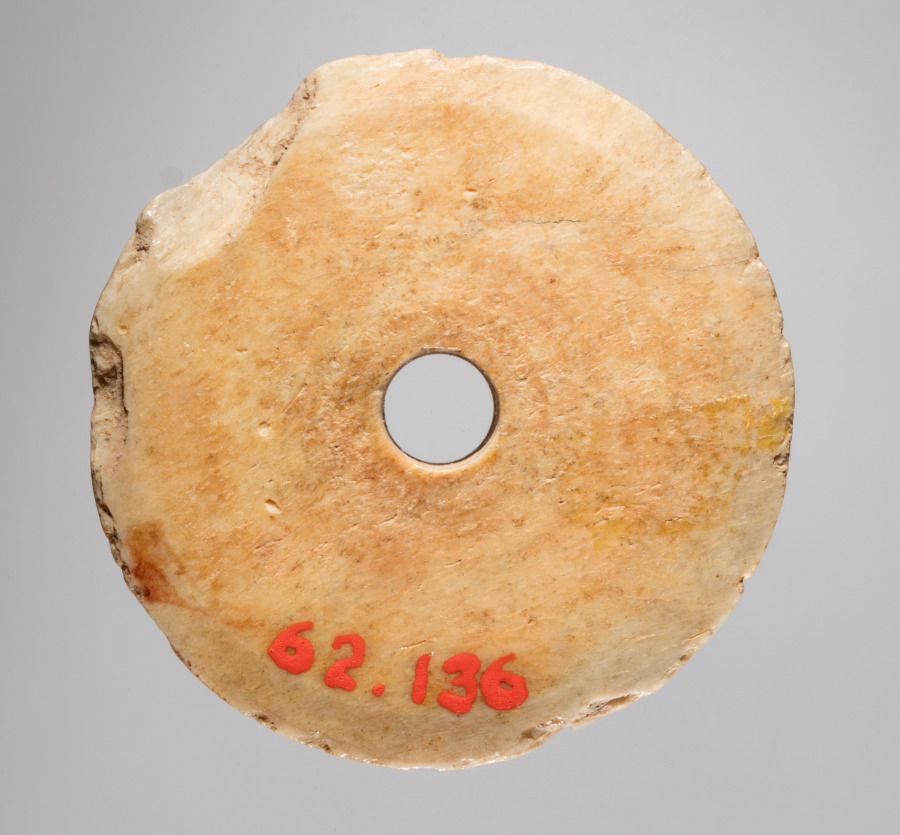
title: Spindle Whorl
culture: Iran, early Islamic period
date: 700s - 900s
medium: bone, incised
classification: Spindle Whorl